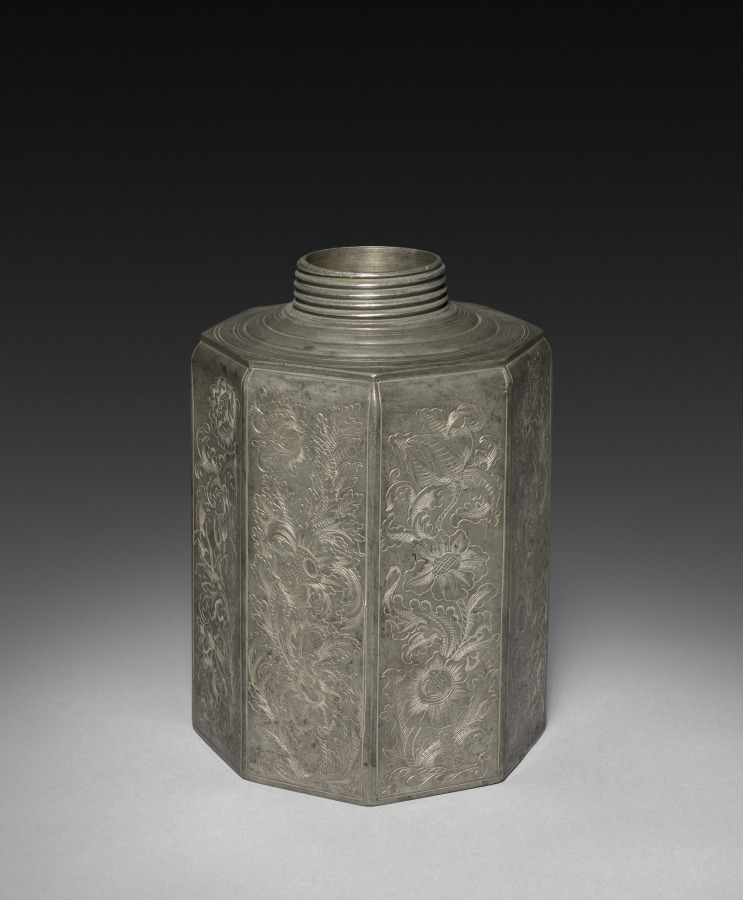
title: Cannister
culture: Germany, 18th century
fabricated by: Johann Melchoir Warner (German)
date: 1715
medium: pewter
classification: Metalwork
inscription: inscribed around the neck: "Johann Melchoir Warner, 1715."